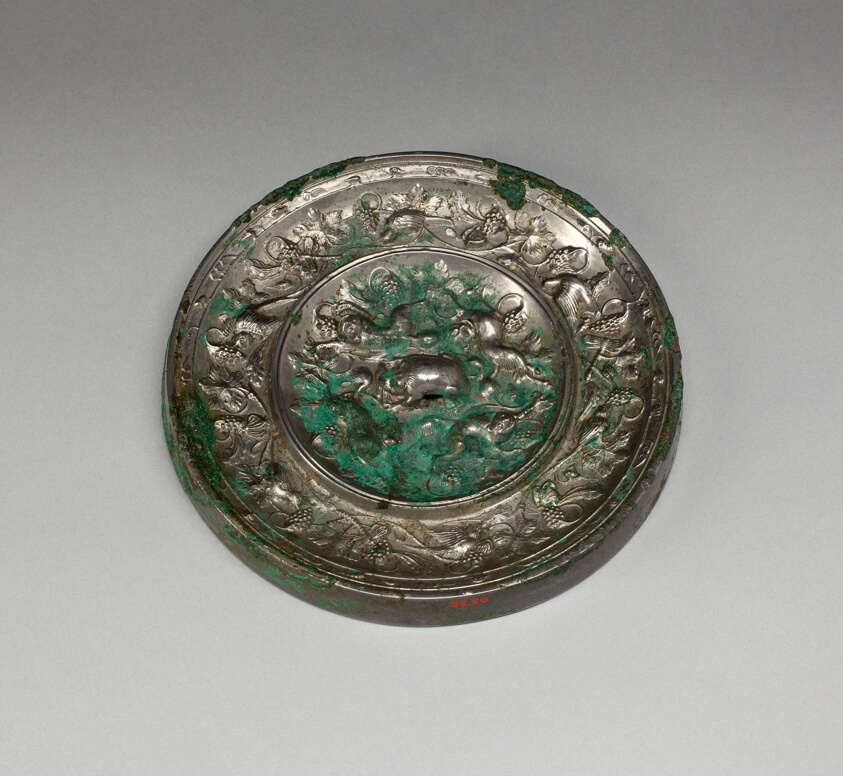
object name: Decorative Arts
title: Mirror with Images of Purity and Immortality and “Lion and Grapevine” Design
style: Chinese (culture or style)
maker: China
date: Tang dynasty (618–907), 8th century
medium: Bronze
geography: China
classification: bronze; metal; mirror; asian art; decorative arts